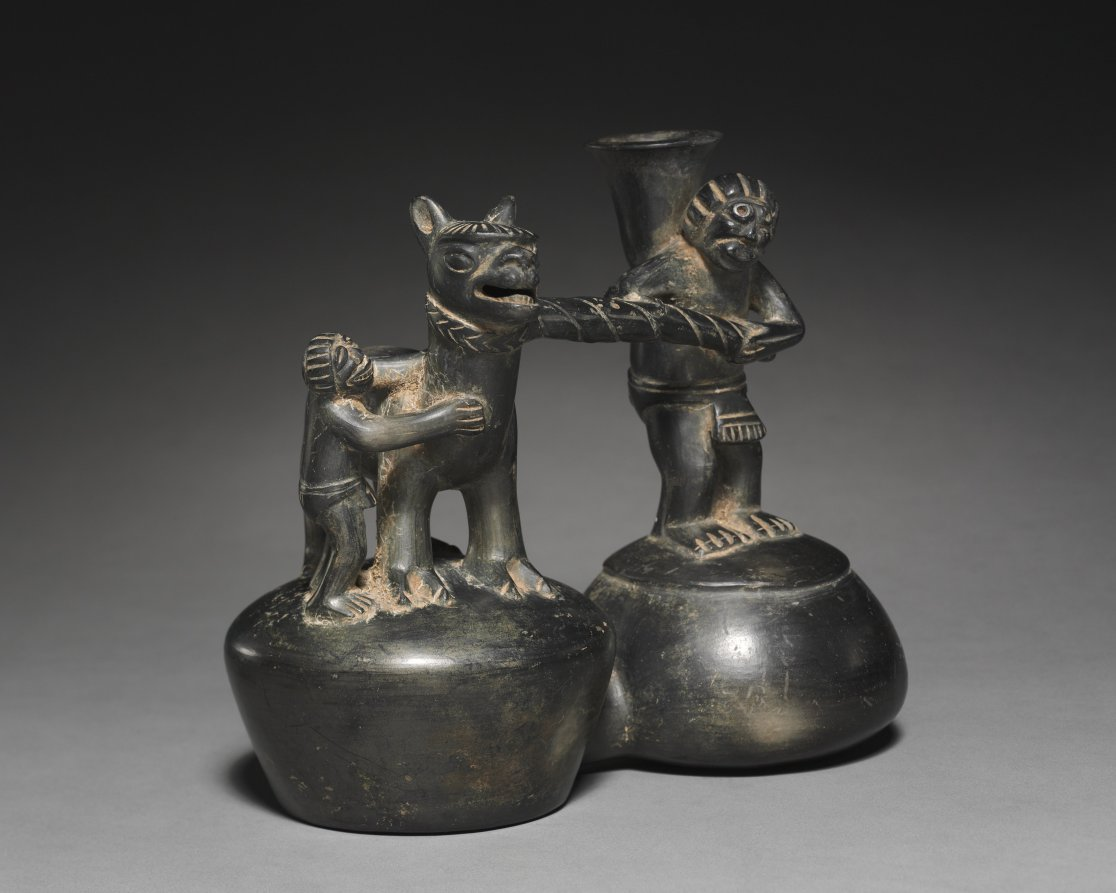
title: Double-chambered Vessel with Figures and Camelid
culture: Andes, Chimú-Inka, late 15th - mid 16th century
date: 1470–1532 (Thermoluminescence date, 1310–1610)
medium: ceramic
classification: Ceramic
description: Under the Chimú, ceramic seems to have been a less important artistic medium than for earlier north coast cultures. Accordingly, ceramics were mass-produced with molds and, rather than bearing painted scenes, often have an overall dark surface achieved by firing in a smoky atmosphere. The double-chambered vessel was made after the Inka conquered the Chimú in the 1460s.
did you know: When this vessel is filled with liquid and tilted back and forth, the camelid emits a whistling sound.